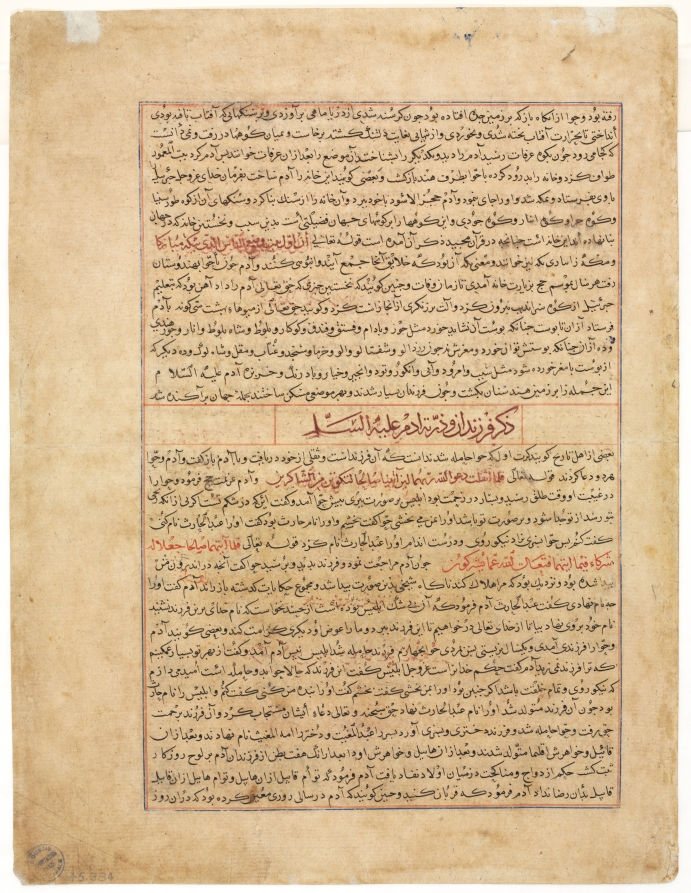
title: Text Page, Persian Prose (recto) from a Manuscript of the Majma' al-Tavarikh (A Compendium of Histories) by Hafiz-i Abru:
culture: Afghanistan, Herat, Timurid period (1370–1501)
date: c. 1425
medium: ink and opaque watercolor on paper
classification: Manuscript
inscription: script: Naskh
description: These page is from a manuscript that evidently was written and illustrated for the library (at Herat) of the Timurid king Shah Rukh, the son of Timur (Tamerlane). The Majma' al-Tawarikh traced the history of the world, beginning with the prophets of the Old Testament until the reign of Shah Rukh.